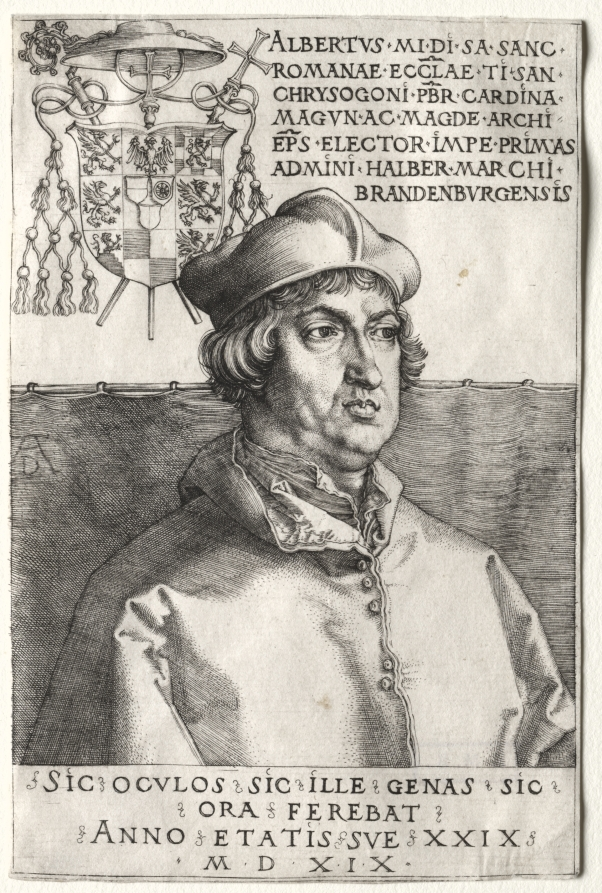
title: Cardinal Albrecht of Brandenburg - The Small Plate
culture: Germany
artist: Albrecht Dürer (German, 1471–1528)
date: 1519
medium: engraving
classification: Print